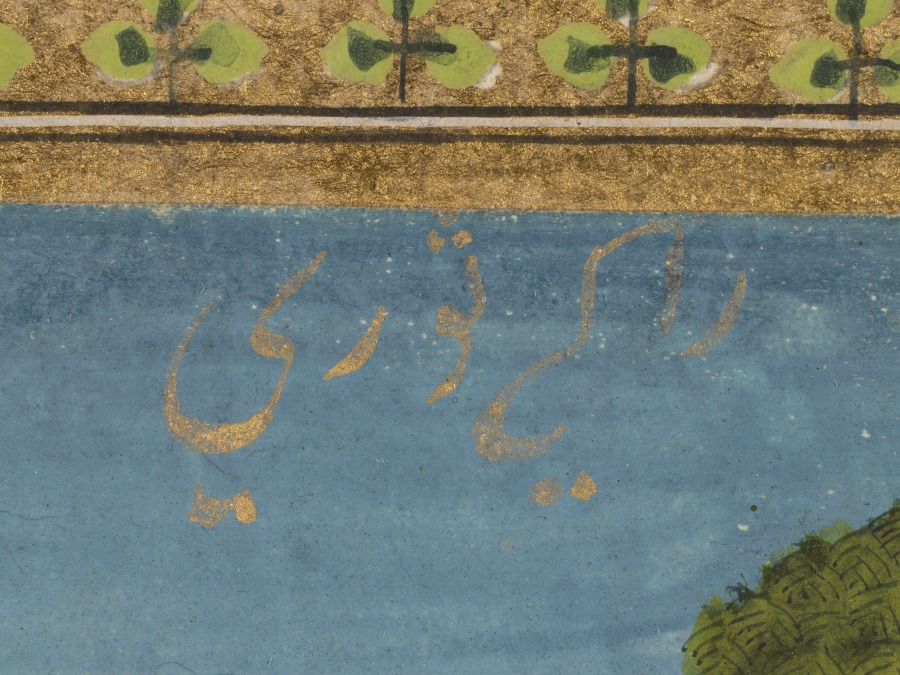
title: Todi Ragini, from a Ragamala Series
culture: Eastern India, Bengal, Murshidabad, 18th century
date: c. 1755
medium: Gum tempera and gold on paper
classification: Painting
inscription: identified at top in gold: ragini todi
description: Ragamala paintings were recognized as being associated with a season and time of day. Evoking a late morning in spring, here a young woman beguiles deer from the woodlands with her music to prevent them from destroying the crops in the field. The saturated hues and romantic idealization of the scene continue idioms begun in the Mughal court that were disseminated to regional centers of patronage such as Murshidabad. The inscription at the top of this page identifies the name, ragini todi, in Arabic script, which suggests that this ragamala series was made for a Muslim patron.